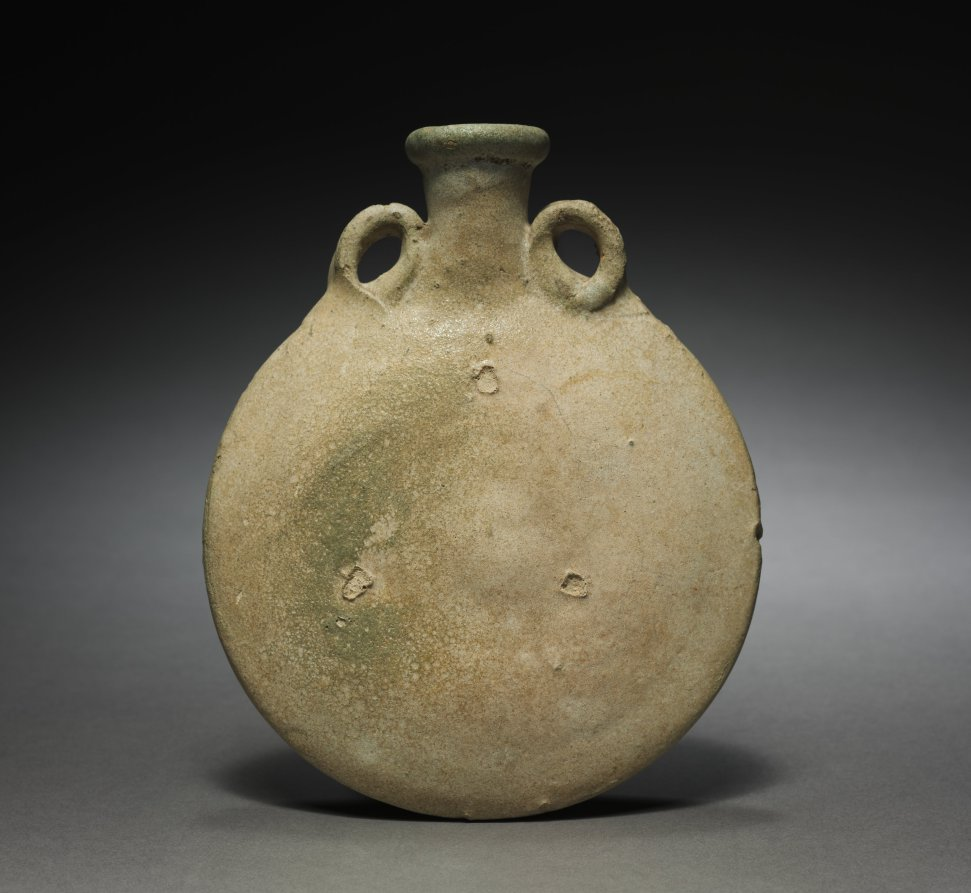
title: Pilgrim Flask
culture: Parthian Empire (247 BCE–224 CE)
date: 1–200 CE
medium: terracotta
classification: Ceramic